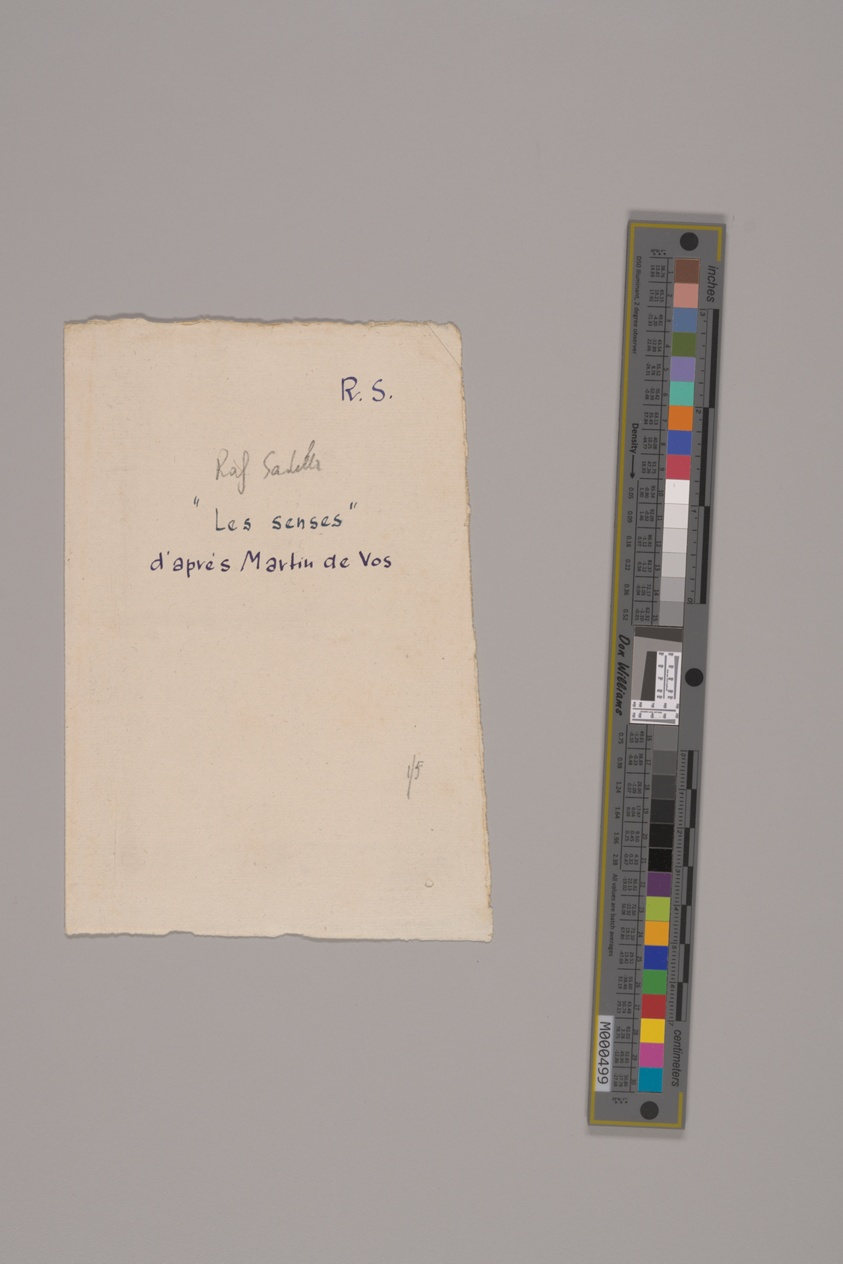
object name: Print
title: Sight, from The Five Senses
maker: Raphael Sadeler I (Flemish, 1560/61–1628/32); after Maarten de Vos (Flemish, 1532–1603)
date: 1581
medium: Engraving on paper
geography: Flanders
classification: engraving; paper; print; prints and drawing